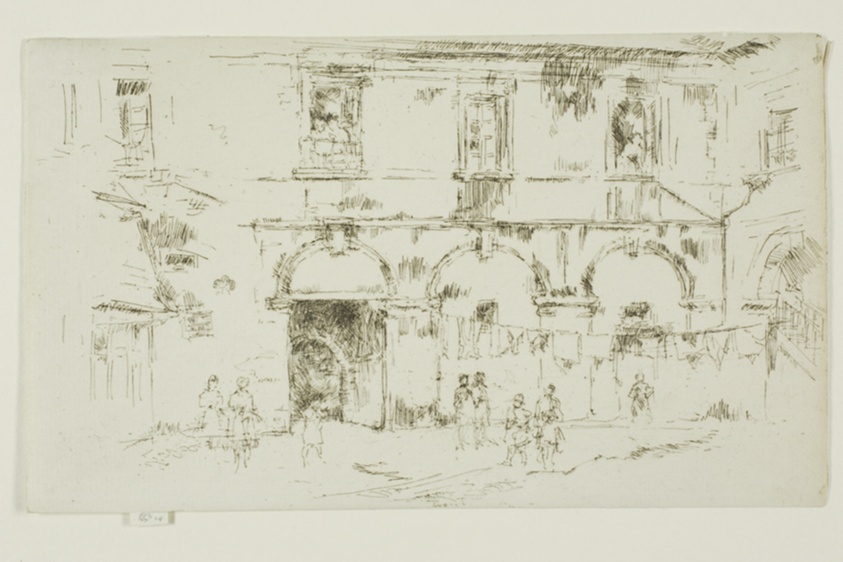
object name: Print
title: Court of the Monastery of St Augustine, Bourges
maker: James McNeill Whistler (American, 1834-1903)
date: 1888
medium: Etching with foul biting in dark brown ink on ivory laid paper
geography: United States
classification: etching; foul biting; print; prints and drawing; paper